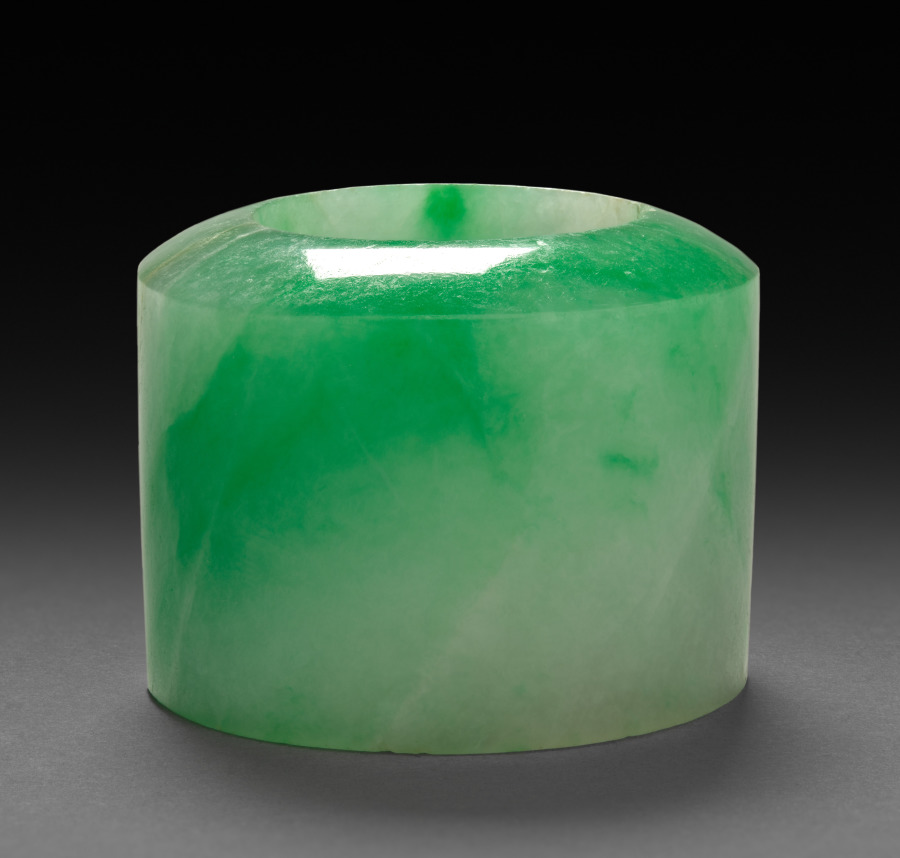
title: Thumb Ring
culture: China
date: 1800s–1900s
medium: green and white jade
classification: Jewelry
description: Jade rings were worn by men on the thumb of the right hand to assist with holding and pulling the string of the archer’s bow. However, thumb rings were also fashionable accessories for civil officials in the late Qing dynasty.